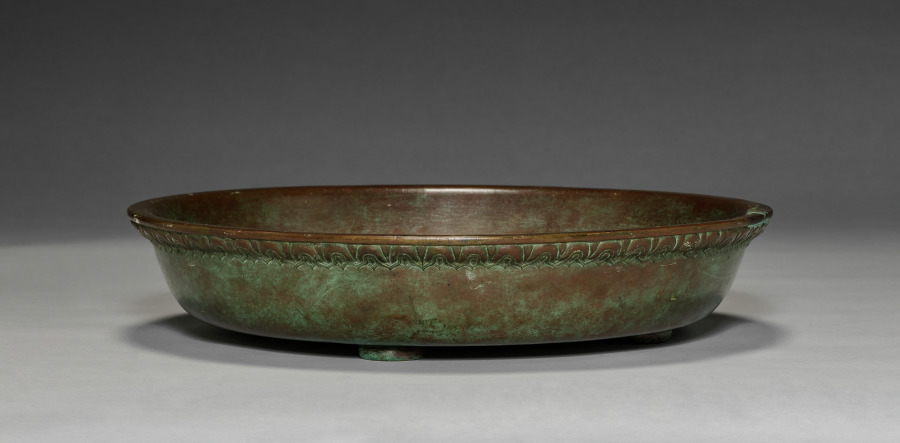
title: Basin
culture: America, New York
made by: Gorham Manufacturing Company (America, est. 1831)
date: early 1900s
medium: bronze, greenish black artificial patina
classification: Metalwork